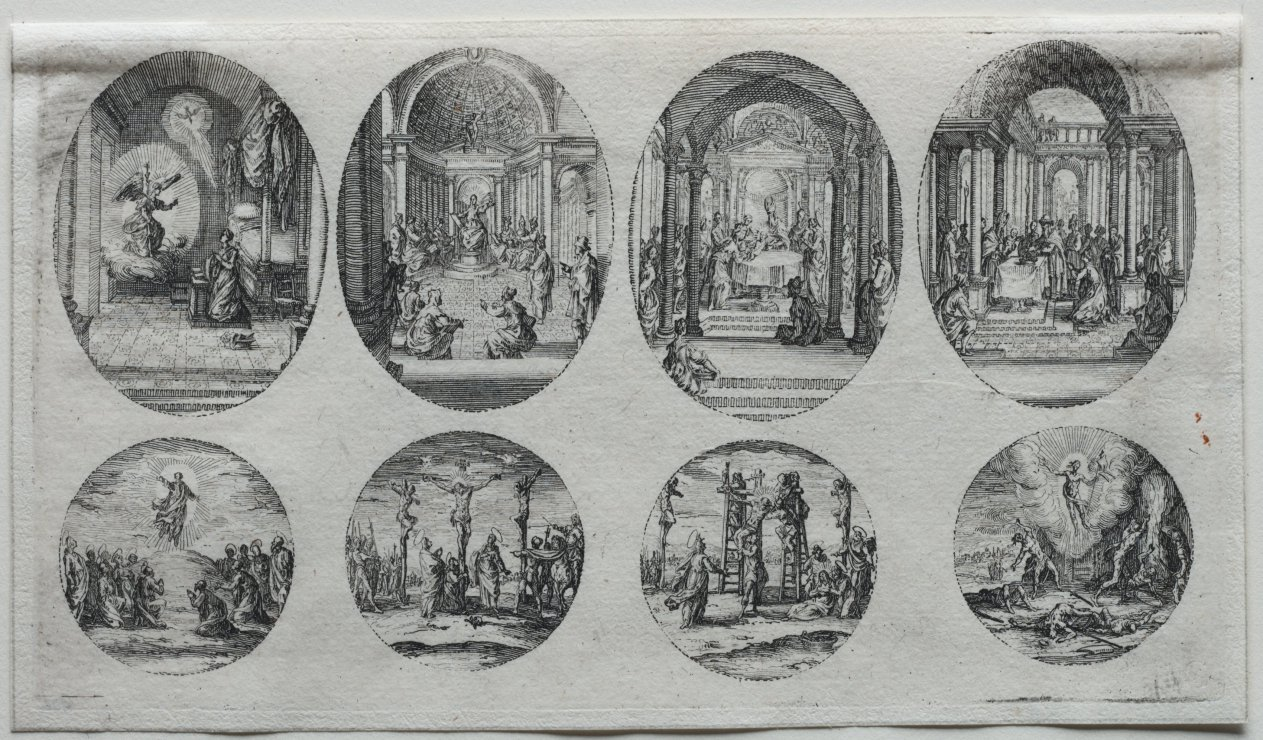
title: The Mysteries of the Passion: The Descent from the Cross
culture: France, 17th century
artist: Jacques Callot (French, 1592–1635)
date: 1631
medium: etching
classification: Print